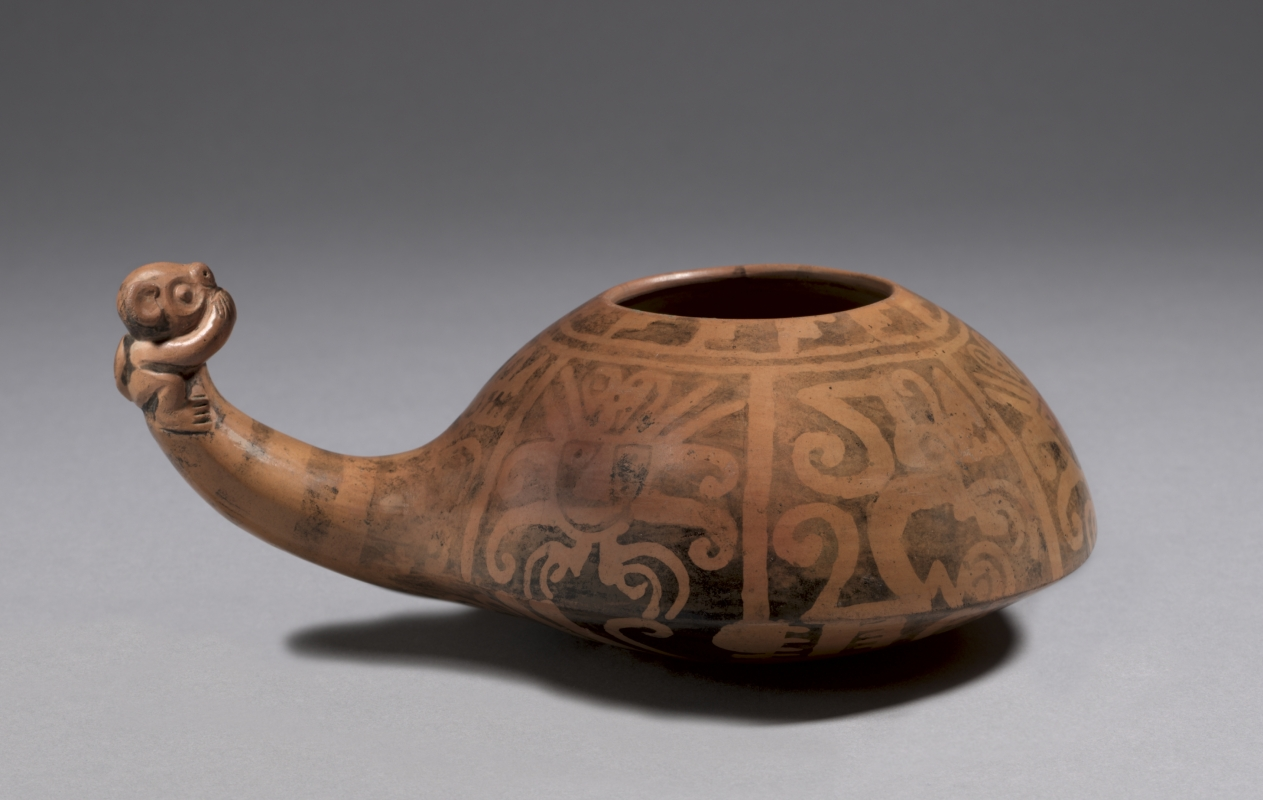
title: Dipper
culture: Peru, North Highlands, Recuay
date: 100 BCE–700 CE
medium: ceramic, slip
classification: Ceramic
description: Both of these objects feature a creature known as the "Recuay feline," although it could also refer to a fox, dog, or viscacha (a rodent). Whatever its identity, the prominent crest on its head ties it to the supernatural realm, a connection underlined by the deity head that also appears on the dipper and by the ritual function of snuff tablets, which were used to inhale hallucinogenic snuffs during religious ceremonies.